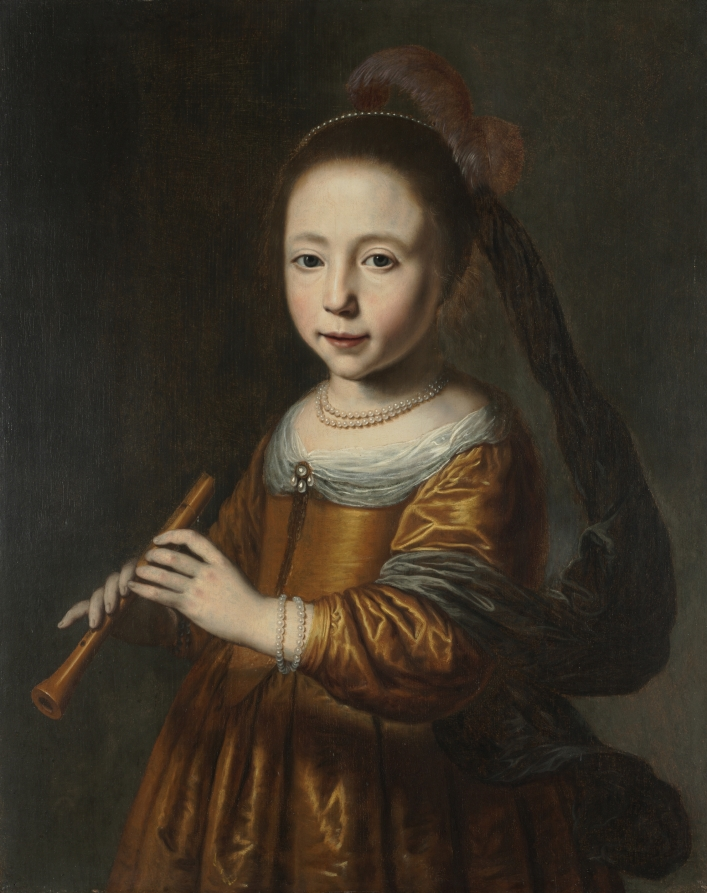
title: Portrait of Elizabeth Spiegel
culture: Netherlands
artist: Dirck Dircksz. Santvoort (Dutch, 1610/11–1680)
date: 1639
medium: oil on wood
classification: Painting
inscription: Inscribed on back: "Elisabet Spiegel"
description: This painting belongs to a series of portraits representing the five senses and each depicting a daughter of a wealthy family from Amsterdam. This portrait of 11-year-old Elizabeth Spiegel, who holds a recorder in her hands, represents the sense of hearing. Her gown of costly satin and pearl ornaments proclaims her family's prosperity, and the imported ostrich feathers from Africa indicate Amsterdam's role as an international trade center.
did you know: Amsterdam was a very important trade center when this portrait was painted in the mid-1600s. In this portrait, the girl wears an African ostrich feather in her hair and her skin appears to glow. Look closely at the way her small hands were treated and the naturalistic way they grip the musical instrument.